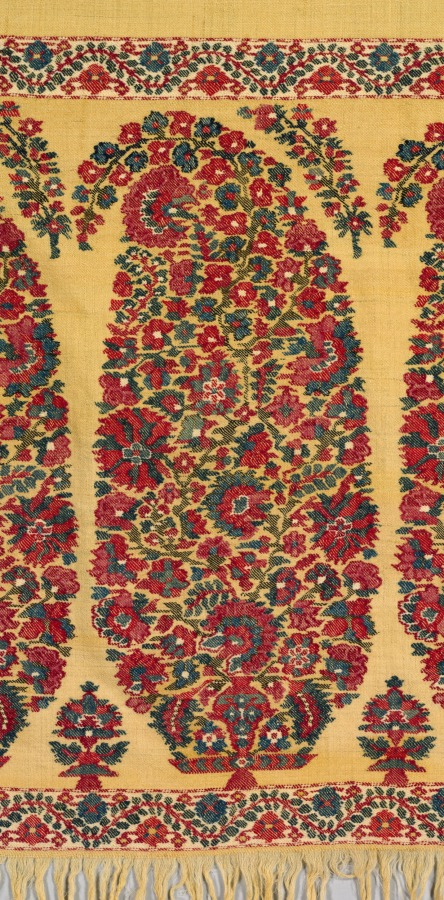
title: Yellow Long Shawl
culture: India, Kashmir, Afghan period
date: before 1815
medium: 2/2 twill tapestry weave [S], double interlocking; wool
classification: Textile